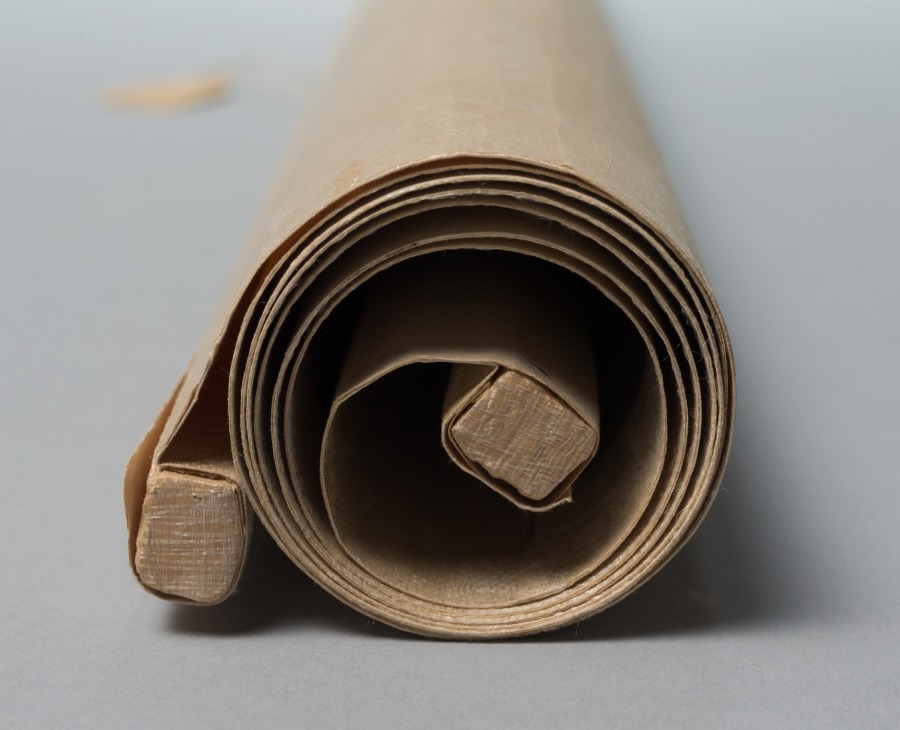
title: Pine-shaded Monastery on a Cloudy Mountain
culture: China, Qing dynasty (1644-1911)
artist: Gu Chao (Chinese, active late 1700s)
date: late 1700s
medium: handscroll, ink and slight color on paper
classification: Painting